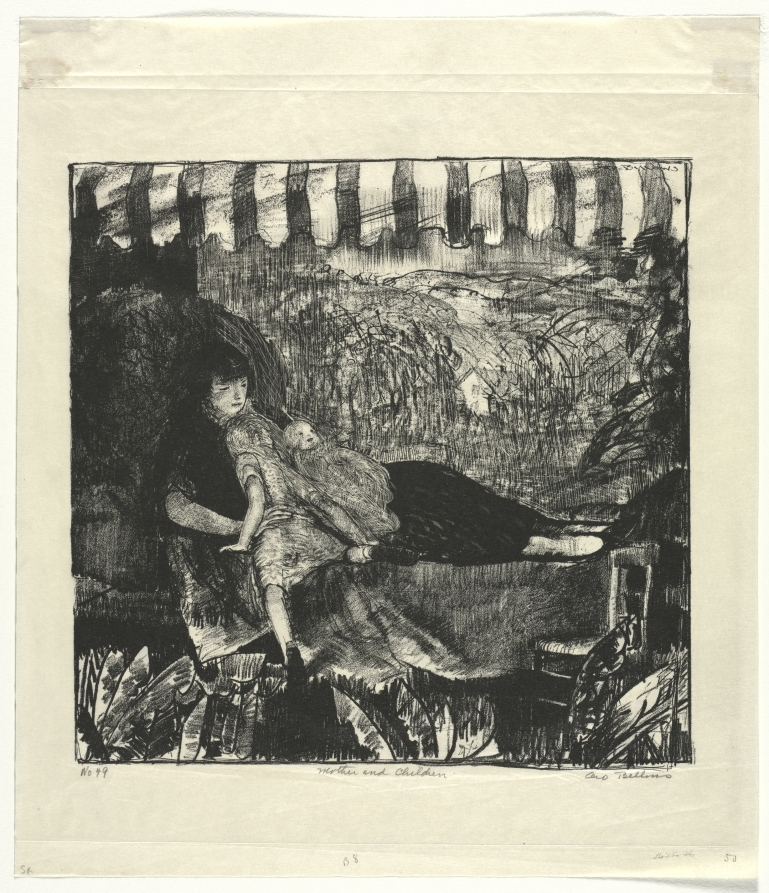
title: Mother and Children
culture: America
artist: George Bellows (American, 1882–1925)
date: 1916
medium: lithograph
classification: Print